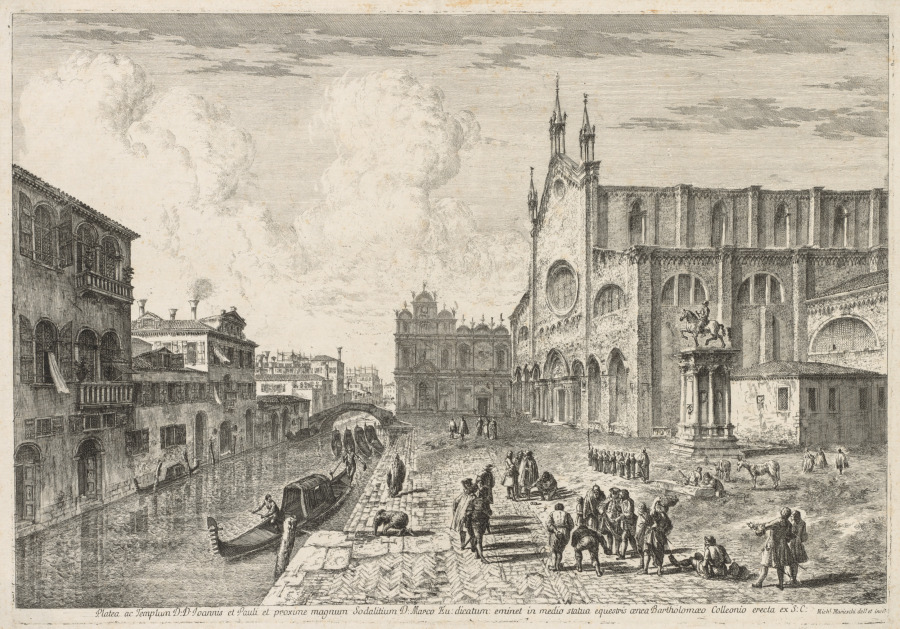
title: Views of Venice: Campo S. S. Giovanni e Paolo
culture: Italy, 18th century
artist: Michele Marieschi (Italian, 1710–1743)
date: 1741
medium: etching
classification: Print